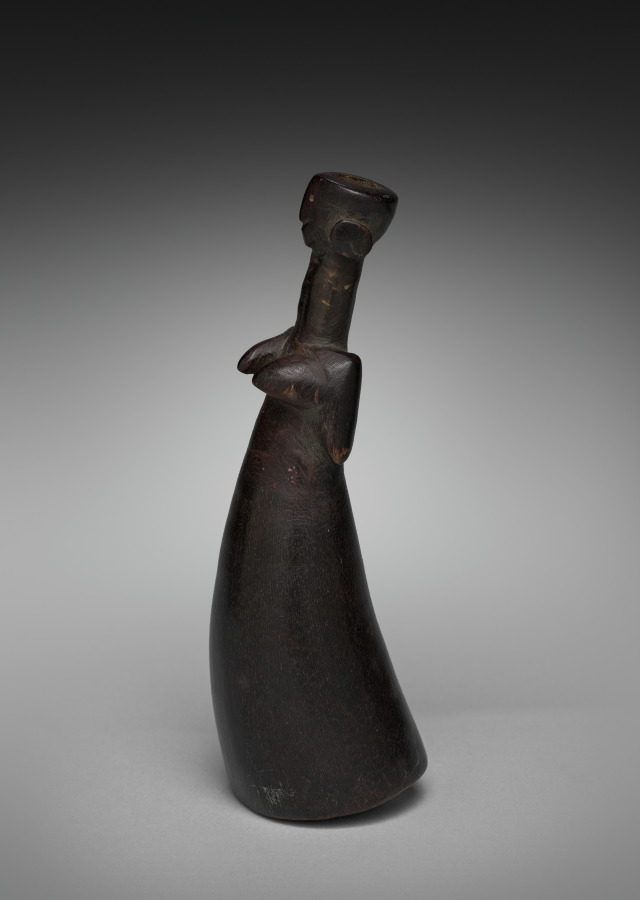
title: Snuff Container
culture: Africa, Southern Africa, Lesotho, South Sotho maker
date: 1800s-1900s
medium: Horn and wood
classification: Vessels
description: This snuff container in the form of a human (female) figure was carved from cattle horn. The form of the image follows the curve of the horn, with arms and hands held to the chest. Despite its smallish size and minimalist execution, this object demonstrates considerable expressive power. Cattle had special meaning for the pastoralist peoples of southern Africa in that it stood for the wealth and status of the individual and the group. However, similar to the ideas associated with tobacco and snuff, cattle also referred to the world of the ancestors. Snuff containers like this one had great significance for their owners and users.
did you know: The tobacco product snuff was stored in decorative, yet useful, containers like this one.